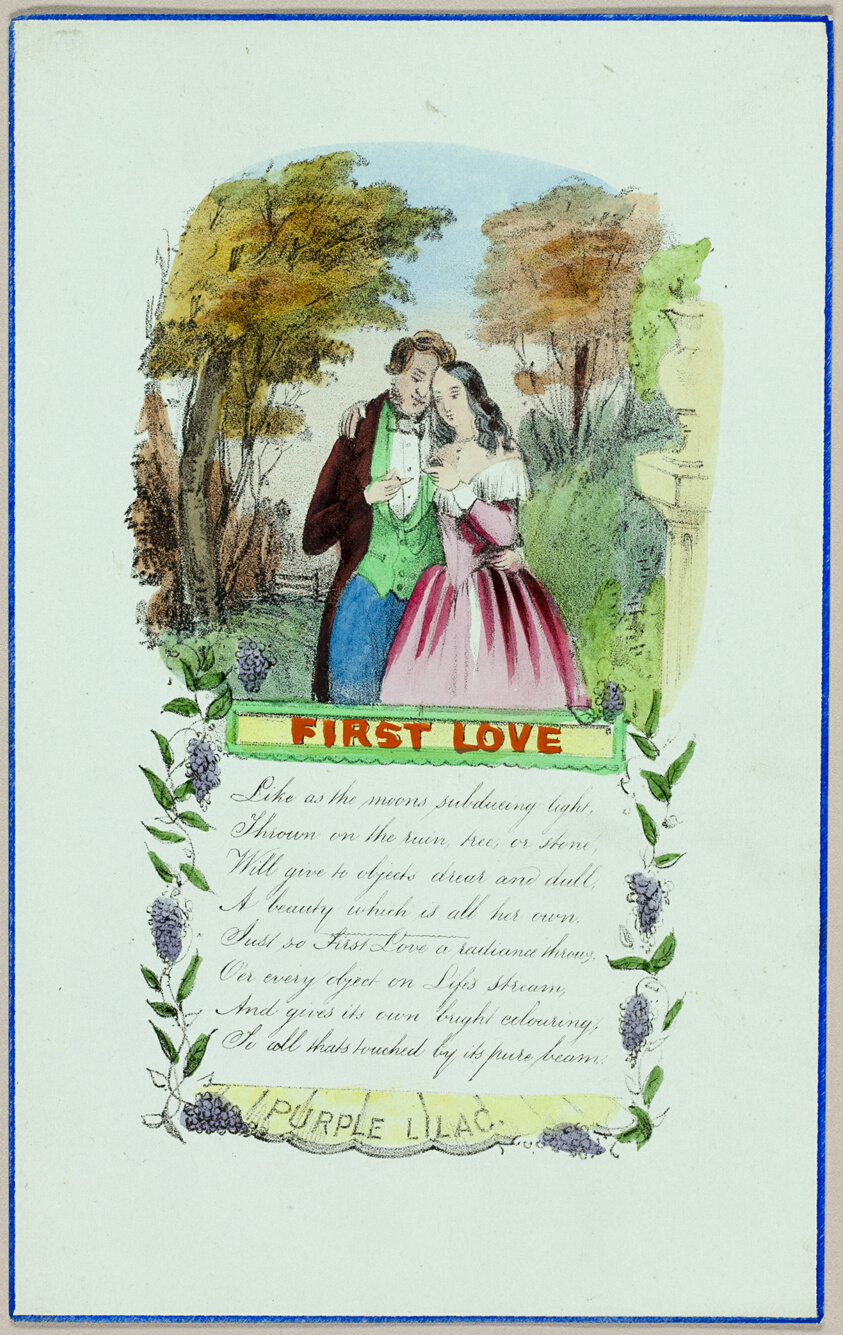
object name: Print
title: First Love (Valentine)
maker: Unknown Artist; English, 19th century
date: c. 1840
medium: Lithograph with hand-coloring on blue-green laid paper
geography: England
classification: valentine; prints and drawing; print